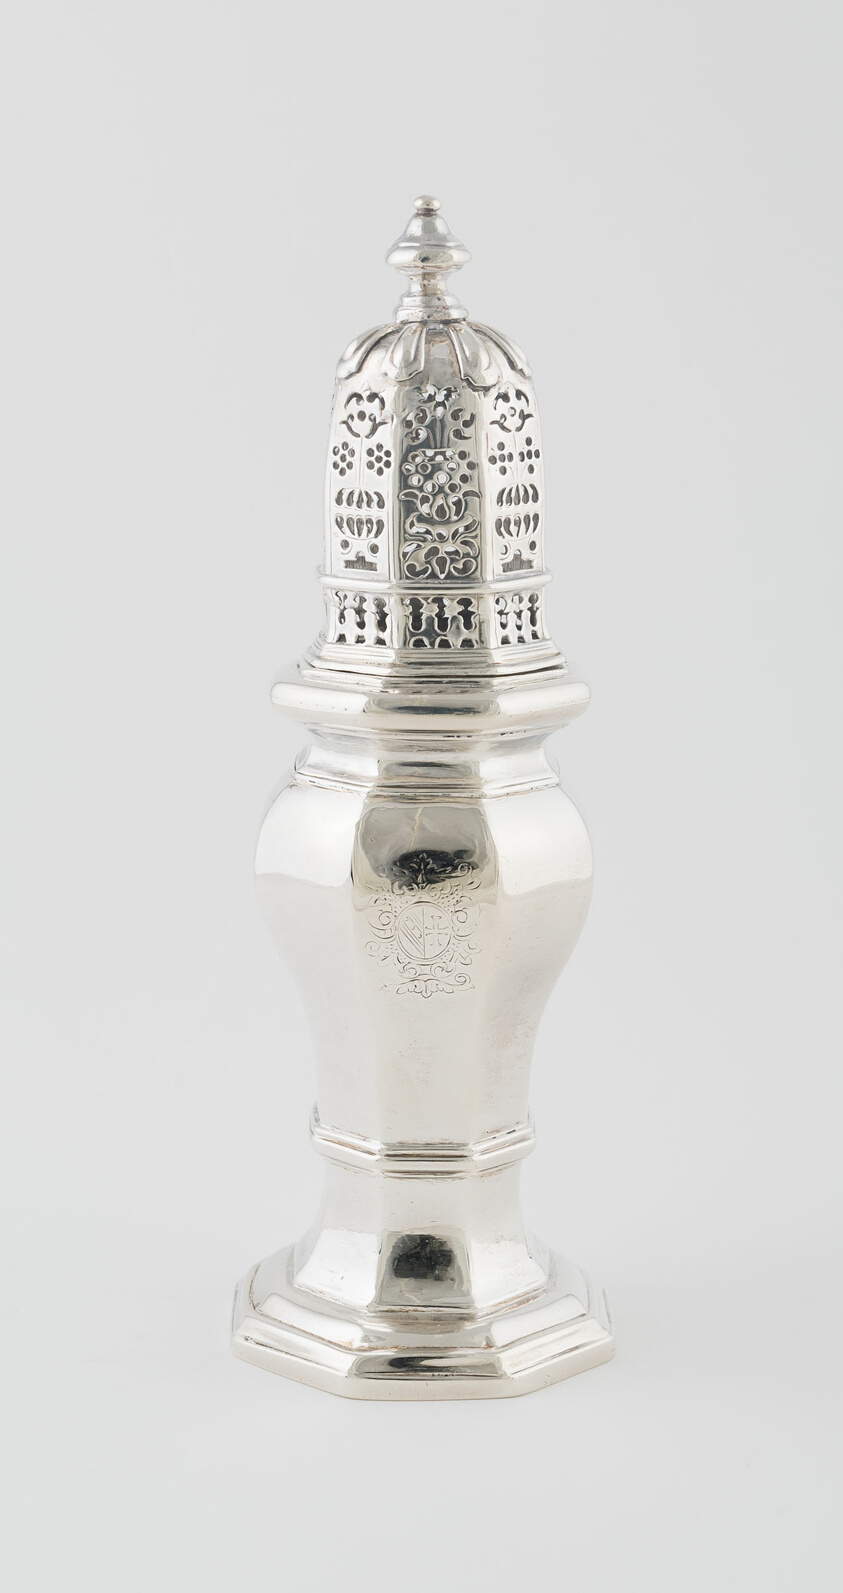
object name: Metalwork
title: Canister (one of three)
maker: Edward Workman; Irish, active 1699-1722; Dublin, Ireland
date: 1704/06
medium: Silver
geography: Dublin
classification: silver; metalwork; european decorative arts